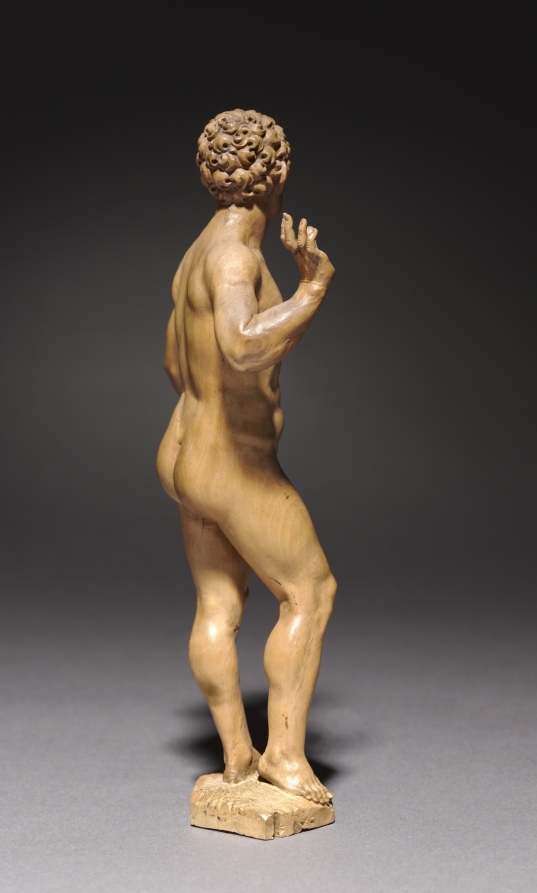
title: Adam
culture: Germany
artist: Daniel Mauch (German, 1477–1540)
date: c. 1535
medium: boxwood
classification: Sculpture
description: Mauch straddled the late medieval and Renaissance traditions in his career. These small-scale statuettes, however, each made from a single piece of boxwood, stem from the most progressive strands of Renaissance art in southern Germany, closely connected to developments in both Italian and German bronze sculpture. The bodies reveal Mauch's careful study of human anatomy as well as a rapport with Albrecht Dürer's well-known print of the same subject.